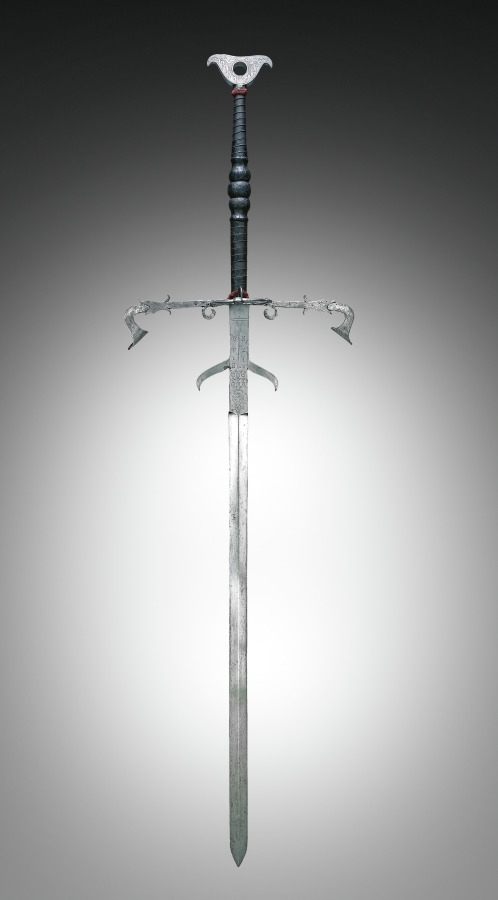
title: Two-Handed Sword of the State Guard of Julius of Brunswick-Lunüneburg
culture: Germany, Brunswick, 16th century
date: 1574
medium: steel, leather and wire bound grip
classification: Arms and Armor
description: This is one of a large series of swords distinguished by the fish-shaped crossbar on the hilt (quillon) and pierced, crutch-shaped pommels. Each sword in this series is also dated and numbered. The crowned monogram of Duke Julius, the year 1574, and the number of this particular sword (N 59) are etched on the portion of the blade between the hilt and the beginning of the sword’s edge (or ricasso).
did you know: The sheer size of this sword is both awe-inspiring and intimidating, but the highly ornate engraved details indicate that it wasn't used in battle. Imagine your security system being a guard wielding a blade similar to this one.